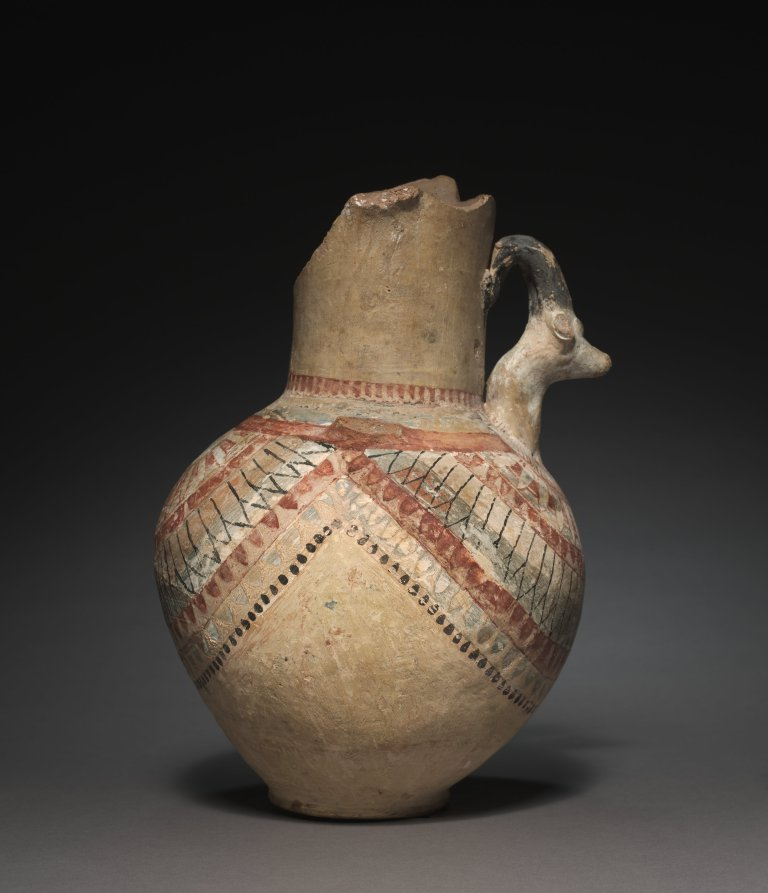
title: Decorated Amphora with Ibex Head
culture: Egypt, Modern pastiche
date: before 1920 this is common era, not BCE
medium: marl clay ware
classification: Vessels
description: A splendid example of the decorated pottery known as "palace ware," made only in Dynasty XVIII. It is painted with garlands imitating the real flowers with which vessels were draped at banquets. This vase was found in the palace of Amenhotep III at southern Thebes.